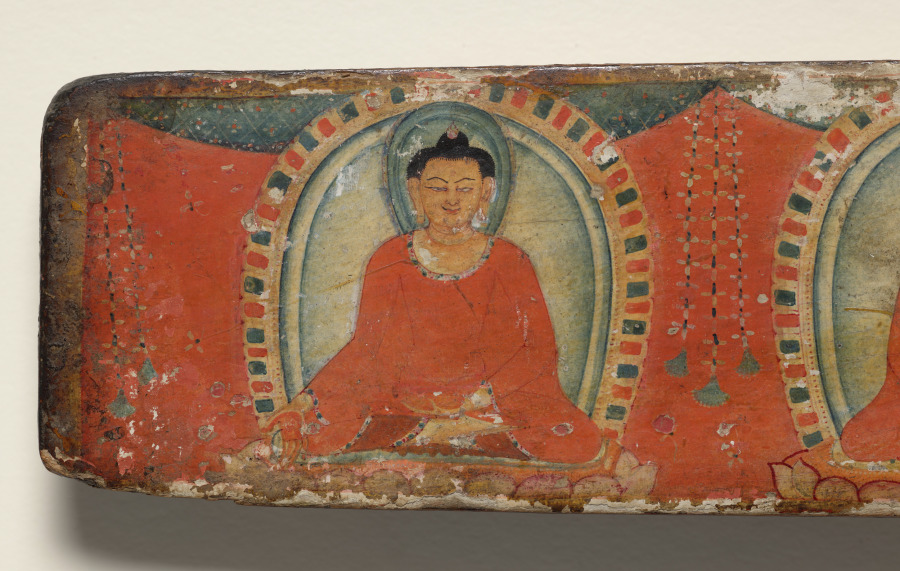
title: Ratnasambhava, Akshobhya, Vairochana with attendants, Amitabha, and Amoghasiddhi, Top cover, from a Manuscript of the Perfection of Wisdom in Eight Thousand Lines (Ashtasahasrika Prajnaparamita-sutra)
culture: Eastern India, Bihar, Vikramashila Monastery. Paintings: Nepal, Kathmandu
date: Sunday, September 14, 1119 (year 239 of the Newar Samvat in the month of Ashvina)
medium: Covers: Gum tempera, colors, and paper on wood; pages: gum tempera and ink on palm leaves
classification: Painting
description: The inner side of the top cover is fully painted with images of the Five Cosmic Buddhas of Esoteric Buddhism. Each one has a different color, meaningful hand gesture, and is associated with a spatial direction. In the center is the white Vairochana holding his hands in the enlightenment mudra. On either side of the binding holes are the other four Cosmic Buddhas Akshobyha (blue, earth-touching mudra, east) and Amitabha (red, meditation mudra, west), and on the ends are Ratnasambhava (gold, gift-giving mudra, south) and Amoghasiddhi (green, fear-not mudra, north). The top side is covered with ritual materials indicating that this book was once an object of worship.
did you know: The Five Tathagatas could be the source of visions that would help Buddhist practitioners on the path to enlightenment.